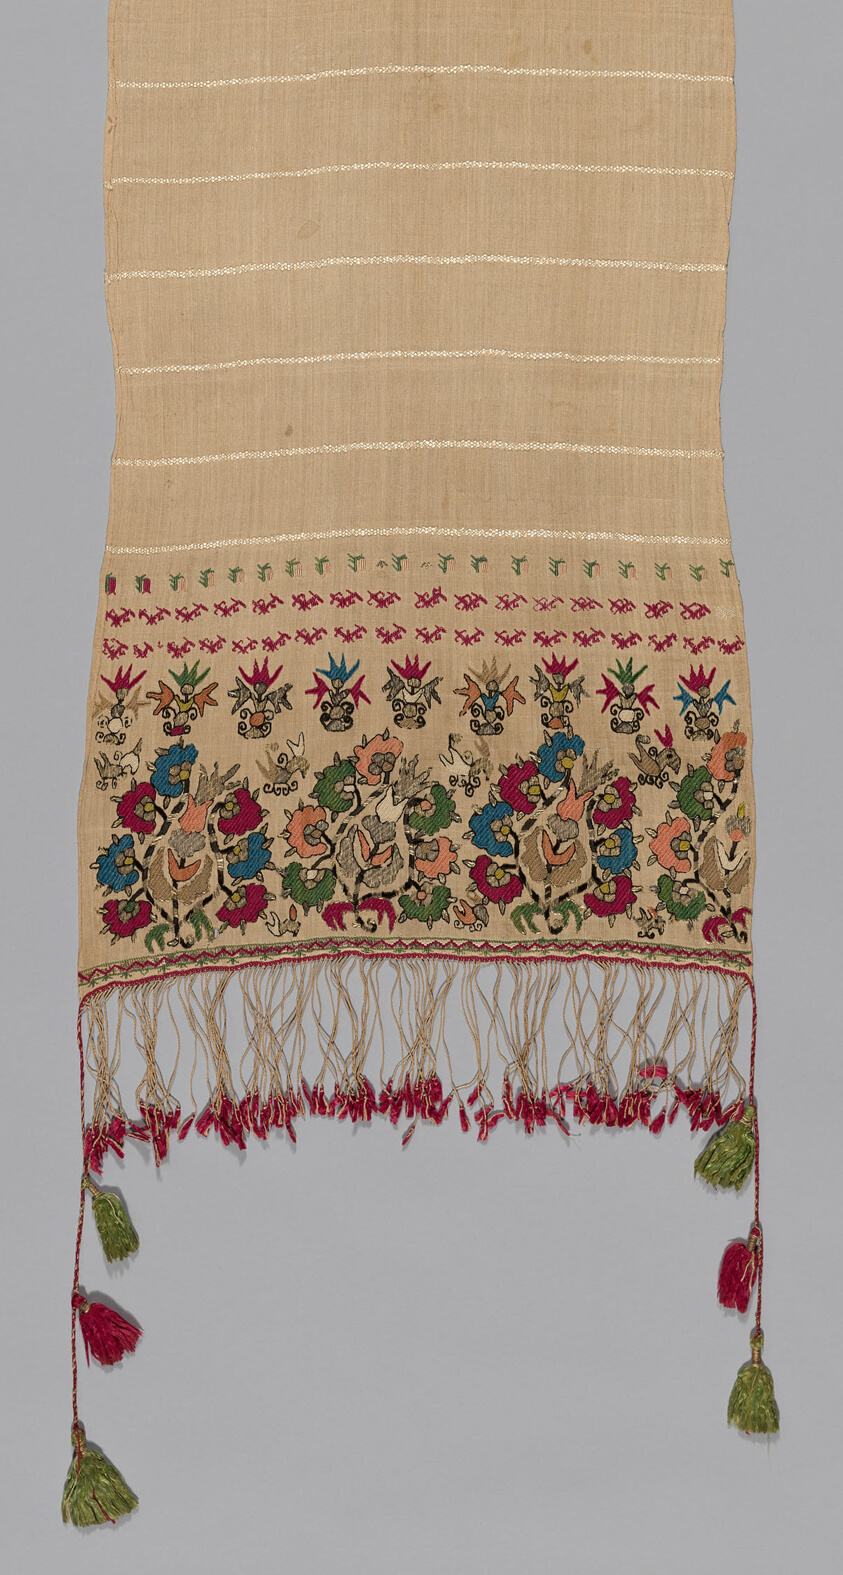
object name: Textile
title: Towel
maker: Greece, Northern Sporades Islands, Lesbos, Mytilene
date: 18th century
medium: Linen and silk, plain weave self patterned by ground weft floats; embroidered with silk and gilt-metal-strip-wrapped silk in Bosnian, flat, double running, running (pattern darning) twined double running, and satin stitches; edged with plied warp fringe with silk and gilt-metal-strip-wrapped silk tassels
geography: Lésvos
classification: textile; needlework (visual works)